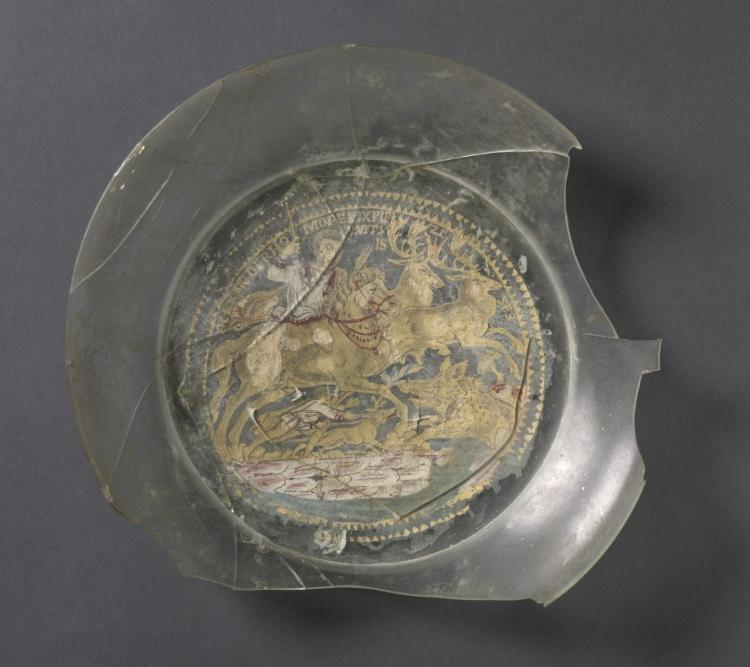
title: Dish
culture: Italy, Roman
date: 235 CE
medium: gold and glass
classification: Glass